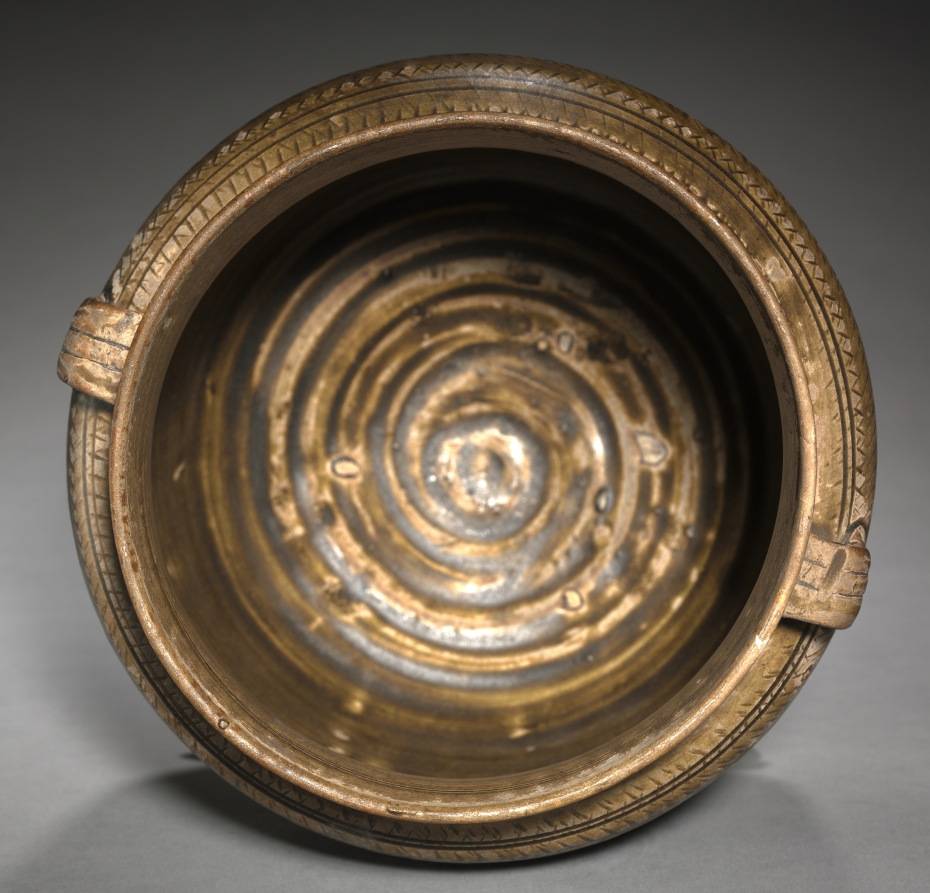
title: Jar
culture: China, Northern, Tang dynasty (618-907) - Five dynasties (907-960)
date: 800s–900s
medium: Glazed pinkish-buff stoneware; Brown ware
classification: Ceramic